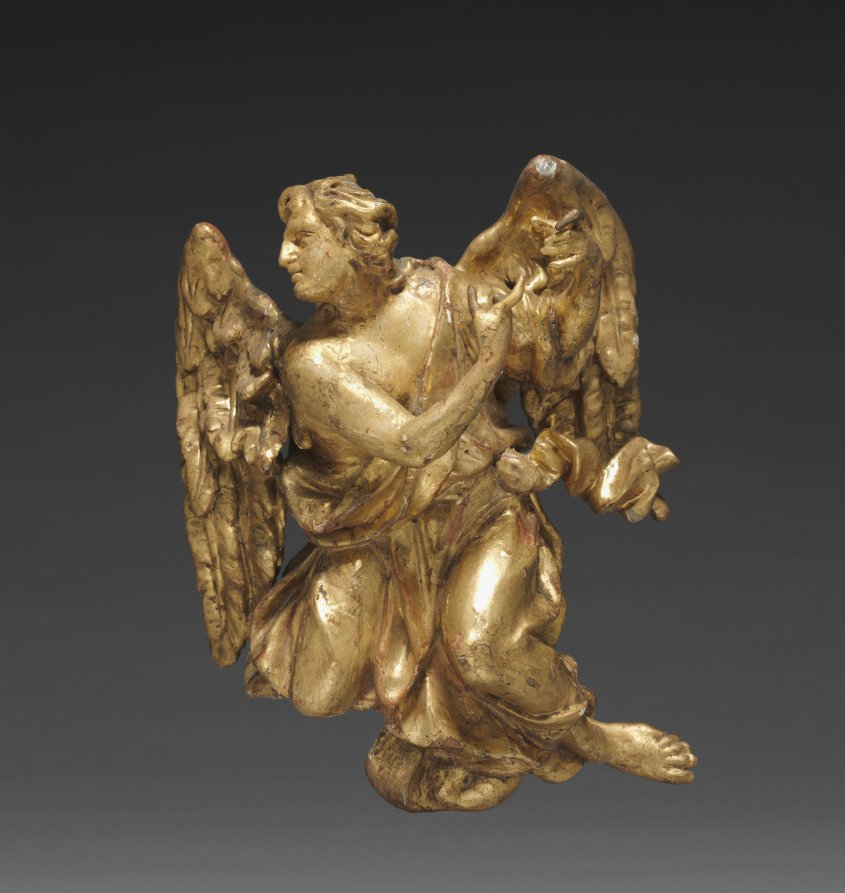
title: Altarpiece with Relics - Angel, lower right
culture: Germany, Bavaria, 18th century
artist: Joseph Matthias Götz (German, 1696–1760)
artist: and Workshop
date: c. 1735–1740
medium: gilded wood, with relics in niches: gilded wood, mother-of-pearl, ebony, red silk, gold wire, seed pearls, rock crystal, pen and ink on paper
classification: Sculpture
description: Götz covers every surface in gold leaf, giving each part of the object equal importance, rather than simply framing a central picture. In this distinctively Central European approach, figural narrative is subordinate to the overall ensemble. Götz designed this object to rest on top of an altar, probably in front of a larger painted or sculpted decorative scheme. The work contains relics seen through the small windows on the perimeter. These small remains of holy figures demonstrate the persistence of a medieval Catholic tradition well into the 1700s.